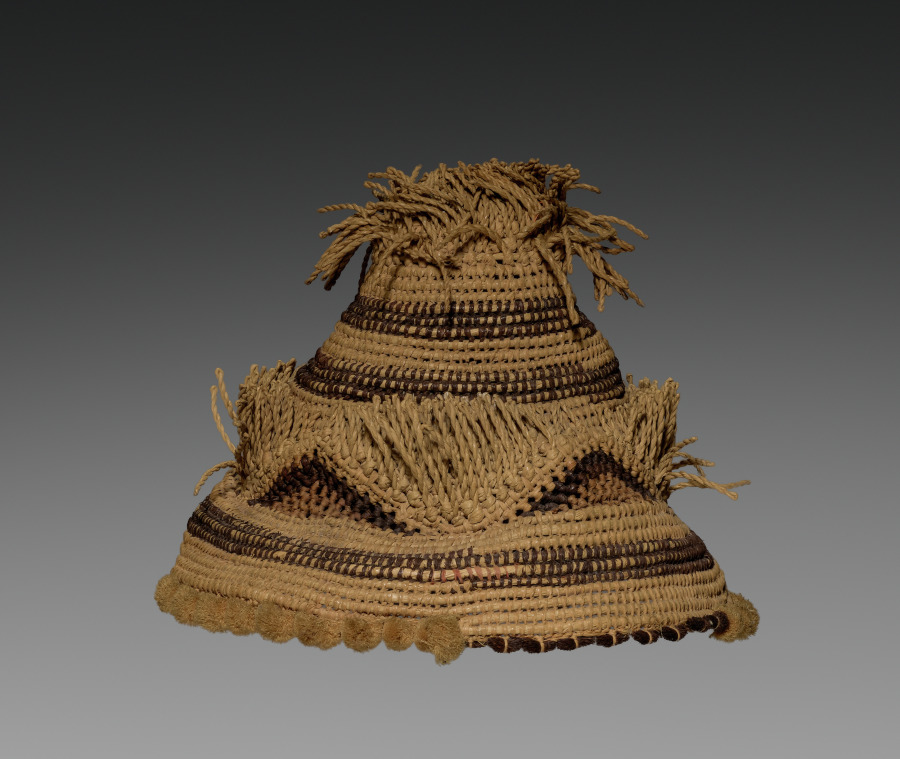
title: Hat with Pin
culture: Africa, Central Africa, Democratic Republic of the Congo, Kuba-style maker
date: early 1900s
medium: Raffia and dye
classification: Garment